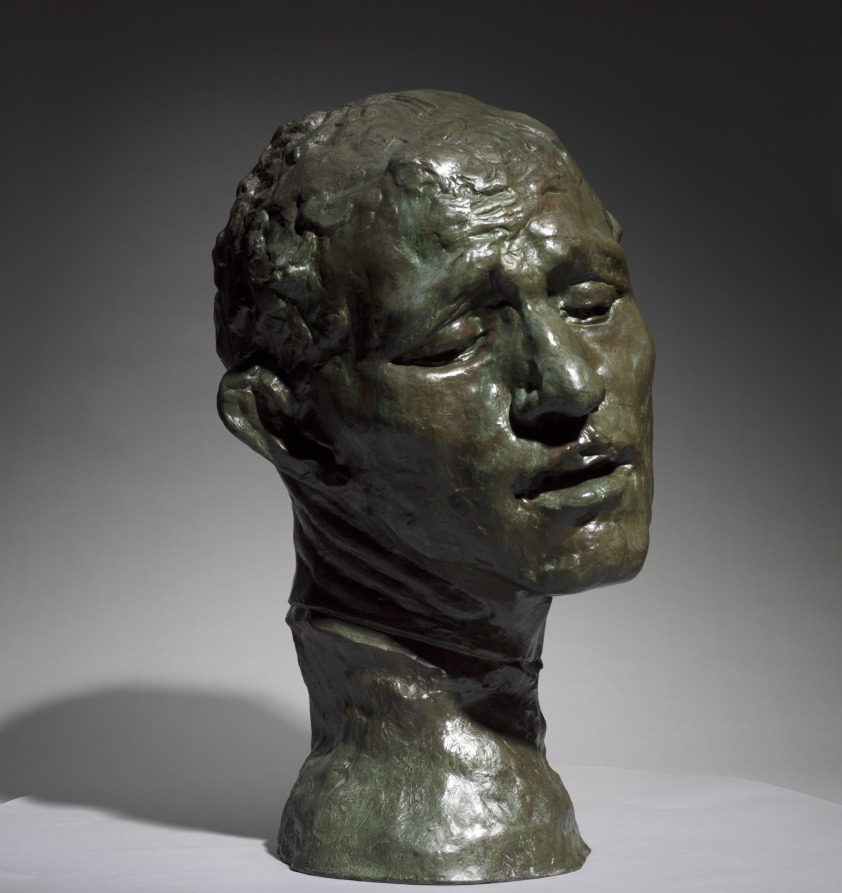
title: Heroic Head of Pierre de Wissant, One of the Burghers of Calais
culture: France, 19th century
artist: Auguste Rodin (French, 1840–1917)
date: 1886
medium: bronze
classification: Sculpture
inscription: inscribed at neck, left: A.Rodin; inscribed lower back: Alexis Rudier/Fondeur-Paris.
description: This sculpture depicts one of the figures in Rodin’s large public monument The Burghers of Calais (1884–89), featuring six French men who volunteered to be taken prisoner by the English in exchange for lifting the siege of Calais during the Hundred Years War (1337–1453). Pierre de Wissant’s anguished expression suggests extreme mental suffering as he contemplates his expected execution. Rodin exhibited a life-size version of the figure as an independent work before completing the monument. He later made multiple versions in various sizes and media.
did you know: This sculpture depicts the head of a figure from Rodin's large public monument The Burghers of Calais (1884-89). The CMA also owns a plaster version of the head.